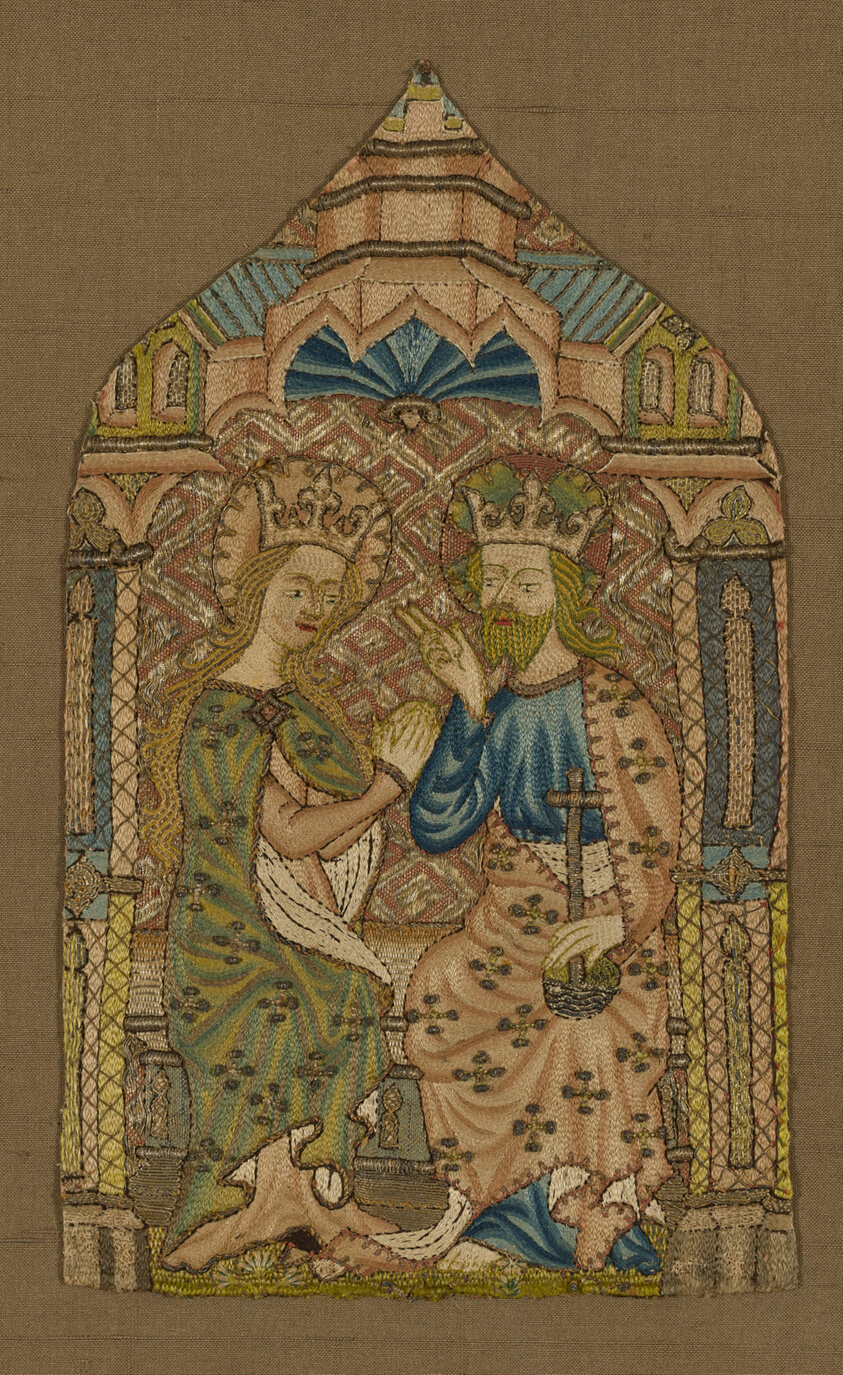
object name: Textile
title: Fragment (From an Orphrey Band)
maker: England, Opus Anglicanum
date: 1400/50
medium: Linen, plain weave; embroidered with silk and gilt-metal-silk-wrapped silk in split and stem stitches; laid work and couching.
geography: England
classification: needlework (visual works); liturgical; textile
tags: religious scenes